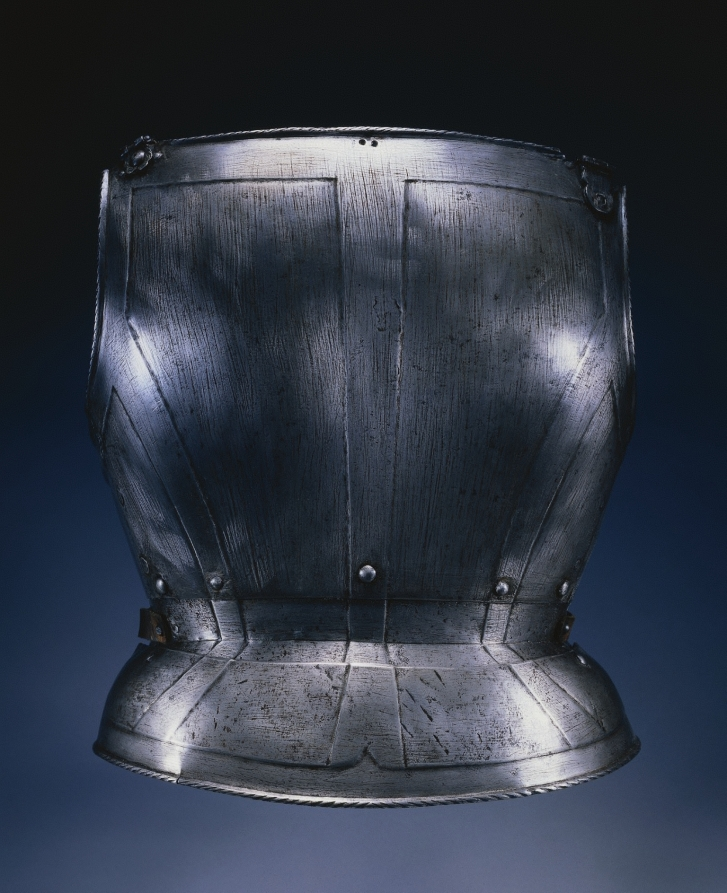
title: Backplate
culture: Germany, Landshut, mid-16th century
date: mid-1500s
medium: steel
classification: Arms and Armor